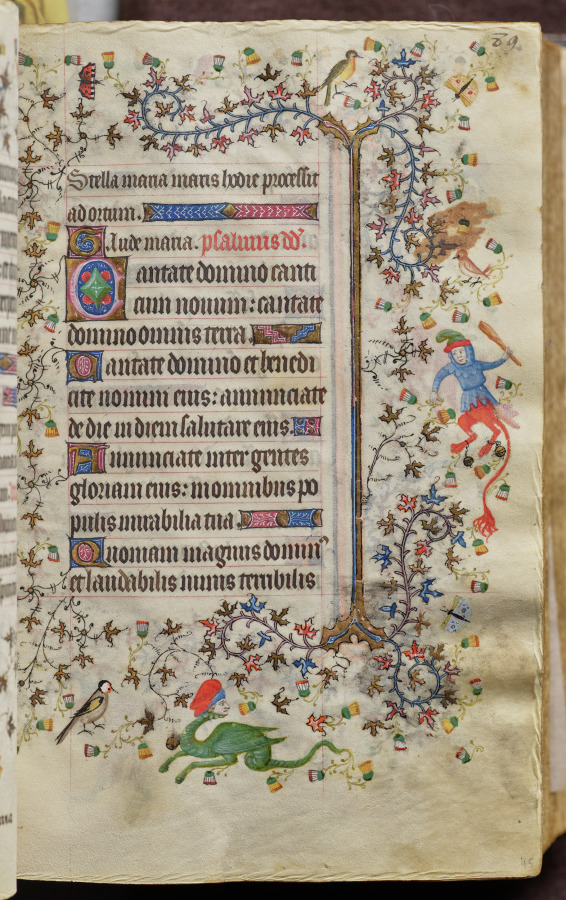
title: Hours of Charles the Noble, King of Navarre (1361-1425): fol. 45r, Text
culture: France, Paris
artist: Master of the Brussels Initials and Associates (French)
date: c. 1405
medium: ink, tempera, and gold on vellum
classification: Bound Volume